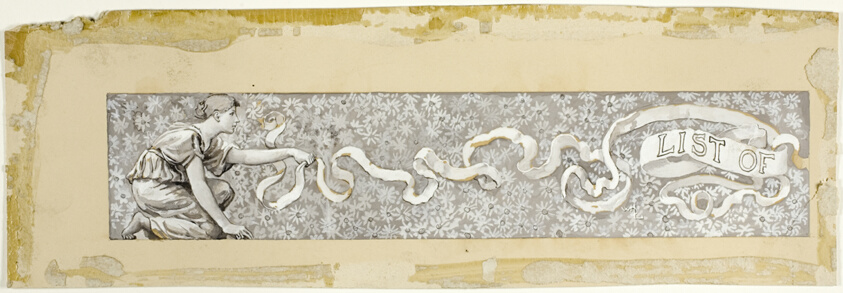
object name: Drawing and Watercolor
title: Head-Piece to List of Drawings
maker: Will Hicock Low (American, 1853-1932)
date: 1885/88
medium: Gray, black and white gouache, with graphite, on tan card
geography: United States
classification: gouache; drawings (visual works); prints and drawing